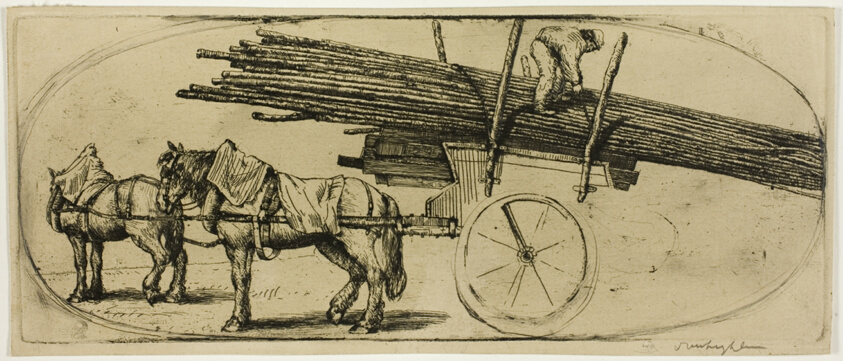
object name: Print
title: The Builders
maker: Donald Shaw MacLaughlan (American, born Canada, 1876-1938)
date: 1904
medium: Etching in black on cream wove paper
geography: United States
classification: etching; print; prints and drawing